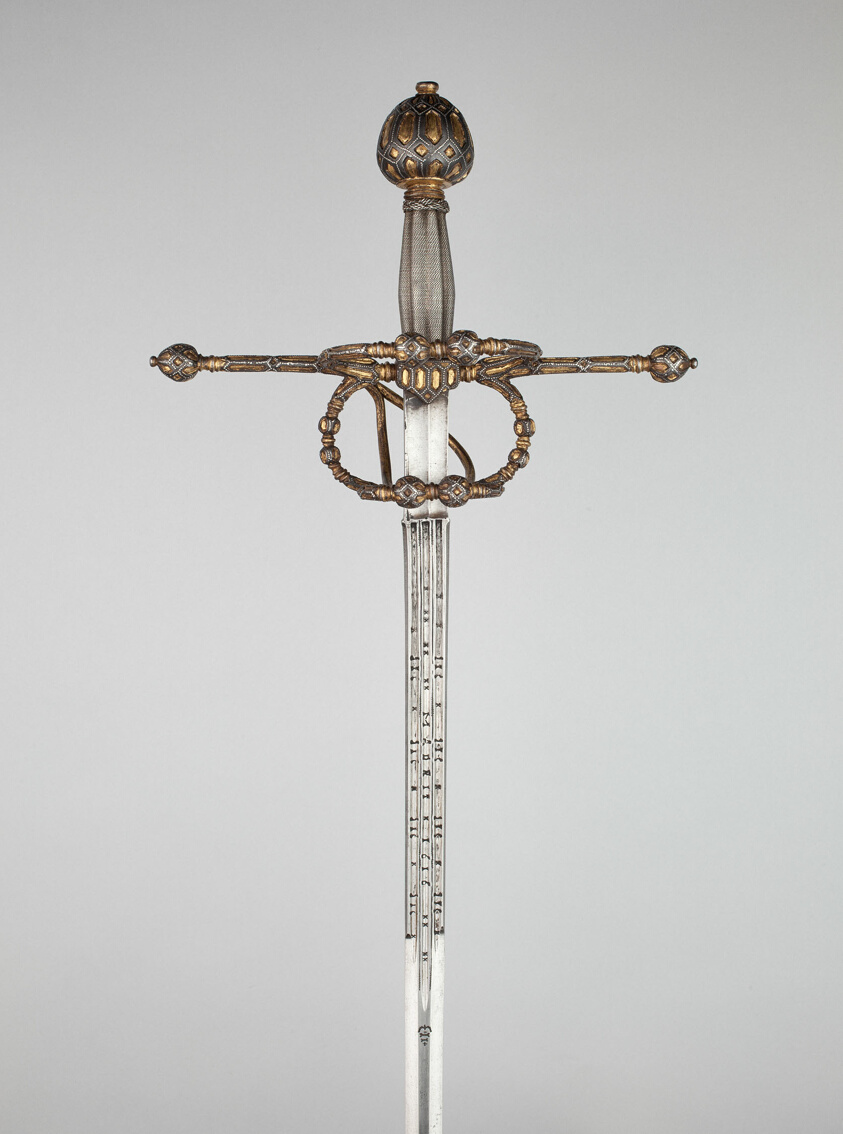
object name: Arms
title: Rapier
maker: Hilt: Italian; Blade: Spanish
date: Blade: dated 1616 Hilt: c. 1570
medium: Steel, iron with gilding, silver, and wood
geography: Italy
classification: edged weapon-sword; arms; arms and armor